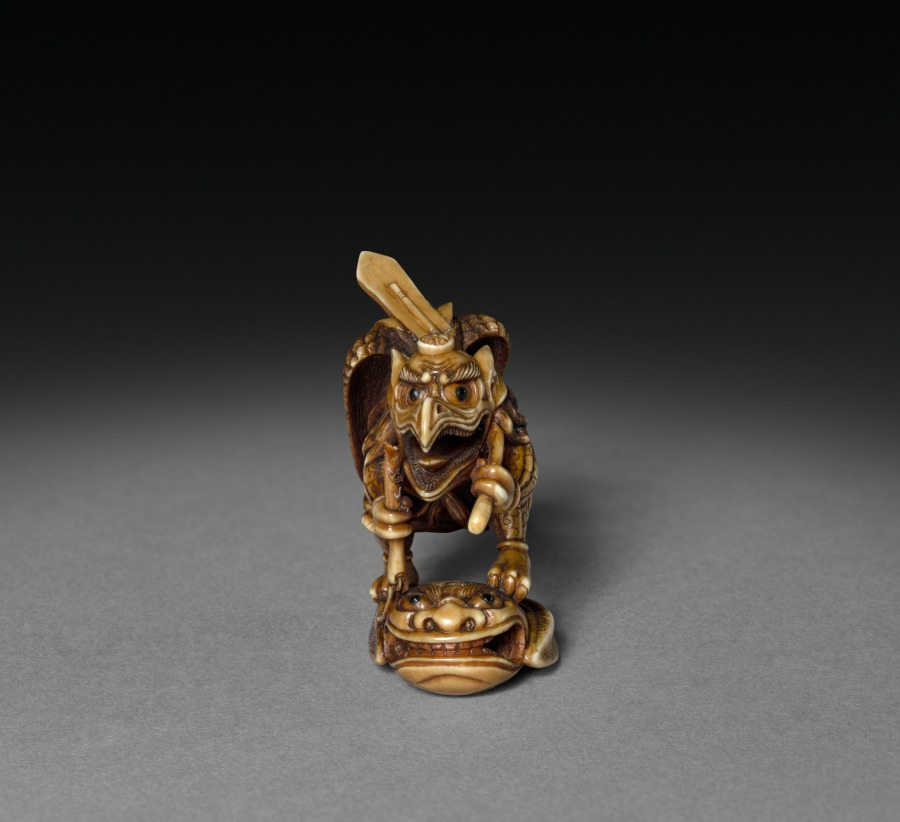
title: Tengu Travelling as a Priest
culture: Japan, Edo period (1615–1868)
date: early to mid-1800s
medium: ivory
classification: Netsuke